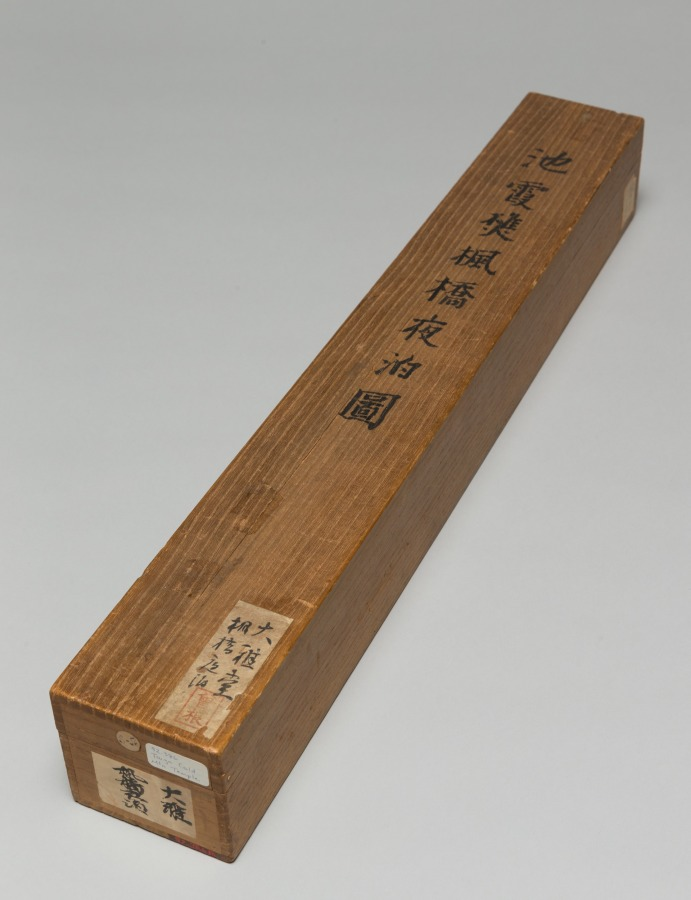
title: Illustration of Zhang Qi's Poem on the Cold Mountain Temple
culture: Japan, Edo period (1615–1868)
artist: Ike Taiga (Japanese, 1723–1776)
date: mid- to late 1700s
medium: hanging scroll; ink and color on paper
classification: Painting